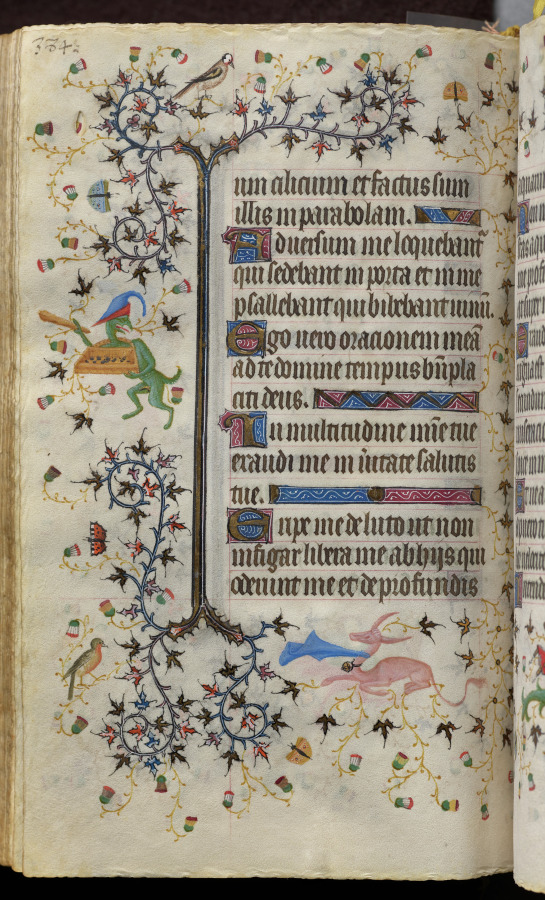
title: Hours of Charles the Noble, King of Navarre (1361-1425): fol. 187v, Text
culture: France, Paris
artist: Master of the Brussels Initials and Associates (French)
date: c. 1405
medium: ink, tempera, and gold on vellum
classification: Bound Volume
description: This precious volume was obviously highly prized by its owner, the French-born King of Navarre, who had his coat of arms painted on no less than twenty folios. Rather than directly commissioning this manuscript from a specific workshop, it seems that Charles the Noble acquired his book of hours -- perhaps ready-made for the luxury market -- while on a trip to Paris in 1404-05. A collaborative effort, six painting styles are evidenced within the pages of this codex, those of two Italians, two Frenchmen, and two Netherlanders. The painter who was responsible for the planning and decoration of the book, and who produced seventeen of the large miniatures, was a Bolognese artist known as the Master of the Brussels Initials. His principal assistant, responsible for most of the borders, was a Florentine who signed his name "Zecho" da Firenze on folio 208 verso.